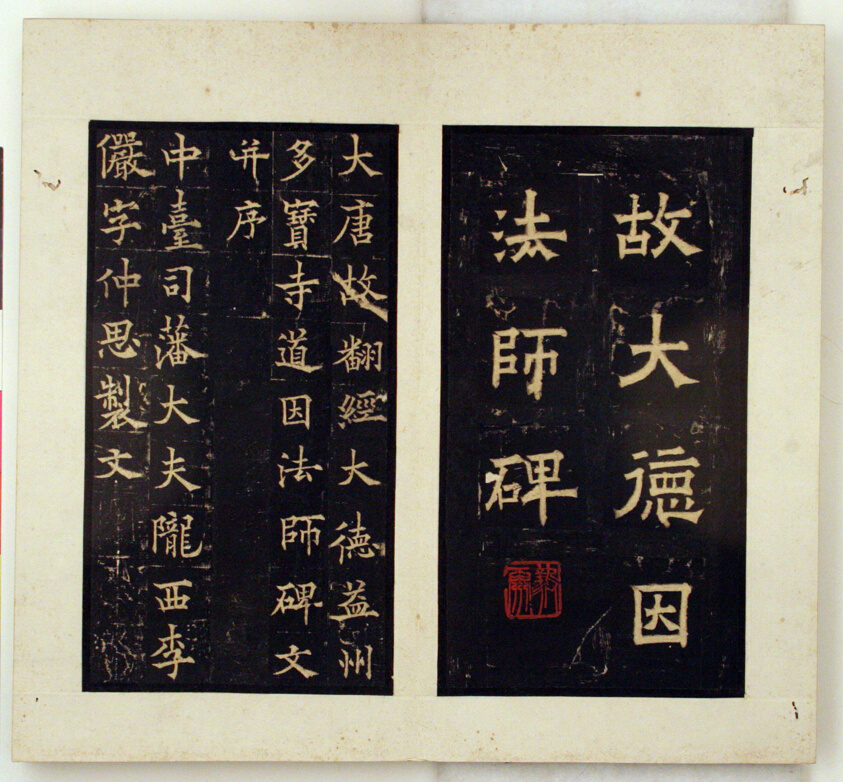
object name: Book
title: Memorial Stele for the Buddhist Master Daoyin (Ink Rubbings)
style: Chinese (culture or style)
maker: Calligraphy attributed to Qiu Ying; Chinese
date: Qing dynasty (1644–1911); Jiaqing–Daoguang reigns, c. 1796–1850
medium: Album of rubbings, ink on paper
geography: China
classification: calligraphy; rubbing; asian art; book